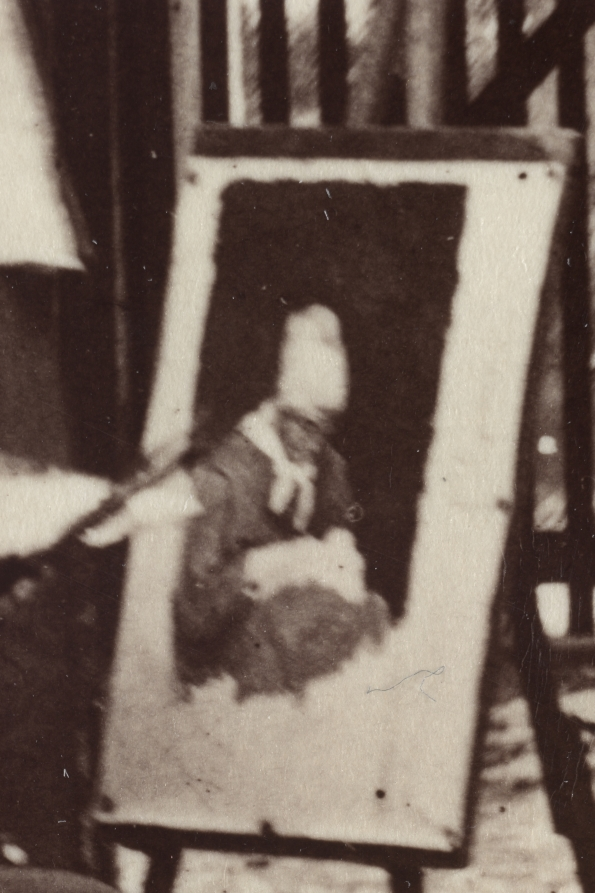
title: Courtyard with Painters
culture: France(?), 19th century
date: late 1860s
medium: albumen print from wet collodion negative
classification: Photograph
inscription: in pencil on reverse: Les Andeys (?) Cour & hotel, G713 and 695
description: This photographer inventively expanded the medium to create a rare example of both early genre (everyday life) photography and documentation of artists at work. The collodion negative captured a wealth of detail. The French village courtyard bustles with activity-the artist in the foreground hugs a squirming child and chats with his wife; a group of peasant women in the background heave huge bundles of laundry about in carts and baskets; and an innkeeper poses proudly for the camera outside his ivy-covered establishment. The diagonals of the sloping roofs and the textures of tiles, wood, and stone enhance the composition's visual interest. A luminous glow, absorbed by open canvas umbrellas, pervades the center of the scene.